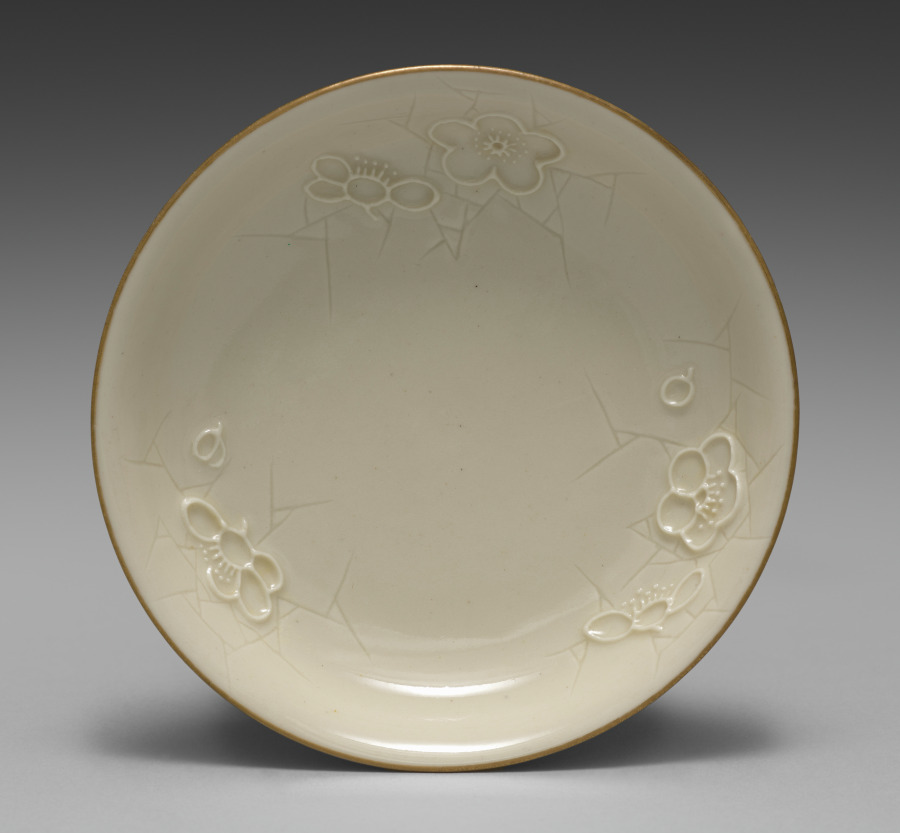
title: Small Dish from Dining Set with Plum Blossoms and Cracked-Ice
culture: Japan, Meiji period (1868–1912)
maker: Seifū Yohei II (Japanese, 1844–1878)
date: c. 1875–78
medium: Porcelain with molded designs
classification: Ceramic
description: Each item in this set has a delicate low-relief design of flowering plum branches over scattered, intersecting lines meant to resemble the cracked-ice surface of a frozen body of water and is signed on the base in gold pigment. While Yohei II produced many fine works in underglaze blue, like those produced by Kiyomizu Shichibei, he also made works in quite different styles later in his career, from the early 1870 s. In 1873, he was appointed purveyor to the Industrial Center of Kyoto Prefecture, a designation associated with Kyoto’s efforts to reach an international market through the port of Kobe; and from 1875 until his death, he was involved in national-level projects to present Japanese ceramics across the world. It was during this period that Yohei III was apprenticed to Yohei II, and it has been suggested that this set may in fact be an early example of Yohei III’s work, which he signed with his teacher’s name. Decorated with flowers resembling Japanese textile motifs, the set calls to mind the design of Yohei II’s pair of vases with plum blossoms in the Victoria and Albert Museum. Here, the elaborate trees created for a formal public exhibition setting have been translated into the approachable blossoms of the genteel domestic environment. While the designs are consistent across the pieces, each raised flower petal and pistil and each incised line in the ice was done by hand, so the cups, bowls, and dishes are similar yet unique. The bottoms of two boxes once identified the set’s owner, but the information has been deliberately obscured with black ink. However, inscriptions still visible appear to indicate two occasions, once at the end of July 1886 , and once again in June 1916 , when parts of the set were requested from Hokura in Niigata Prefecture. The location corresponds to a neighborhood in the present-day city of Jōetsu. The surname Tsuji 辻 also appears on a paper tag affixed to one of the box cloths. Future research may possibly reveal more about their provenance. A vase by Yohei III in a private collection combines the formal grandeur of the Yohei II vases in the Victoria and Albert Museum with the gentler design of this dining set, placing flowering plum trees against soft, scalloped-edge clouds resembling those in golden screens.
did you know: The dining wares have a creamy white coloration that the four boxes containing them identify as Korean in style.